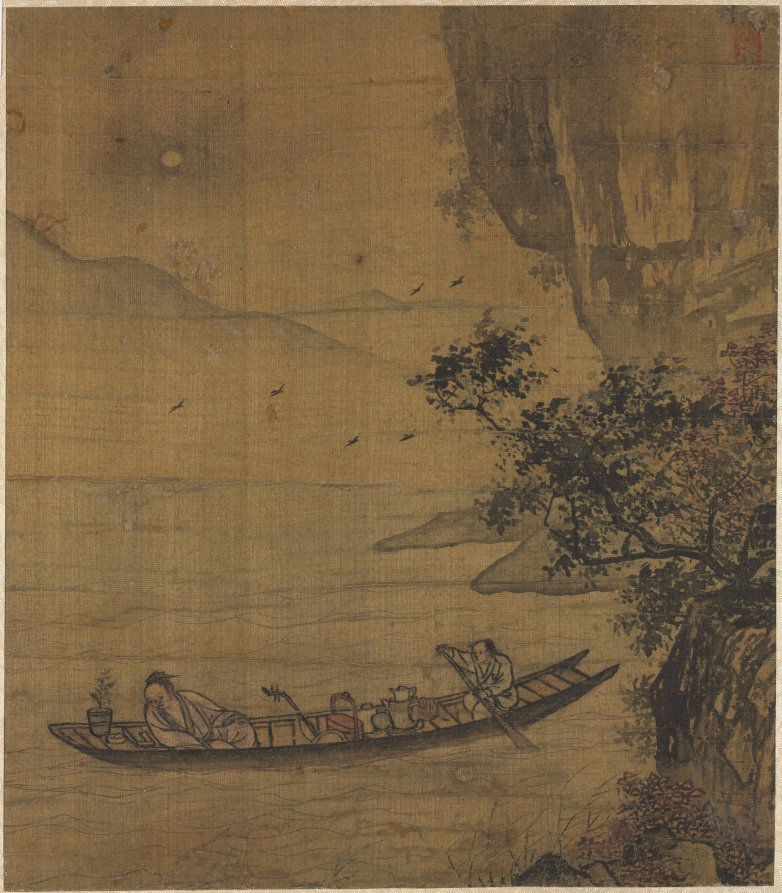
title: Boating in Moonlight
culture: Korea, Joseon dynasty (1392–1910)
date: 1600s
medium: album leaf; ink on silk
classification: Painting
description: Painted in bold brushstrokes and ink wash, contrasting black and white, and occupied and voided space, this intimately sized painting depicts a scholar-hermit enjoying elegant boating under moonlight. The theme of a moonlight boat excursion below a cliff depicted in this work echoes the tradition of illustrating "Ode to the Red Cliff," a pair of poems by Su Shi, famous Northern Song Chinese poet (1037–1101).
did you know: Look how many objects are contained in this little boat—a potted plant, a book, a pear-shaped lute, a tiered lunch box, a tea pot, and a portable stove.